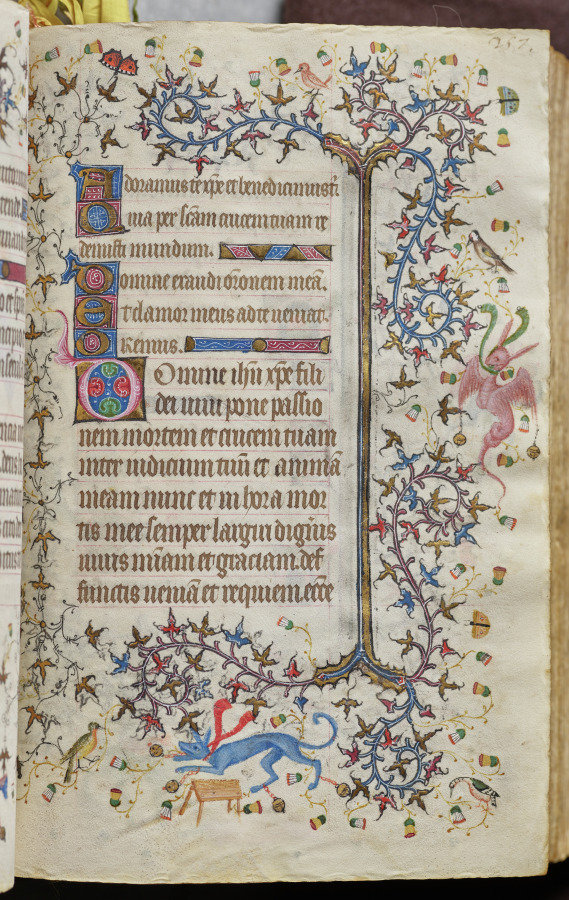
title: Hours of Charles the Noble, King of Navarre (1361-1425): fol. 129r, Text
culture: France, Paris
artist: Master of the Brussels Initials and Associates (French)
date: c. 1405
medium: ink, tempera, and gold on vellum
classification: Bound Volume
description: This precious volume was obviously highly prized by its owner, the French-born King of Navarre, who had his coat of arms painted on no less than twenty folios. Rather than directly commissioning this manuscript from a specific workshop, it seems that Charles the Noble acquired his book of hours -- perhaps ready-made for the luxury market -- while on a trip to Paris in 1404-05. A collaborative effort, six painting styles are evidenced within the pages of this codex, those of two Italians, two Frenchmen, and two Netherlanders. The painter who was responsible for the planning and decoration of the book, and who produced seventeen of the large miniatures, was a Bolognese artist known as the Master of the Brussels Initials. His principal assistant, responsible for most of the borders, was a Florentine who signed his name "Zecho" da Firenze on folio 208 verso.